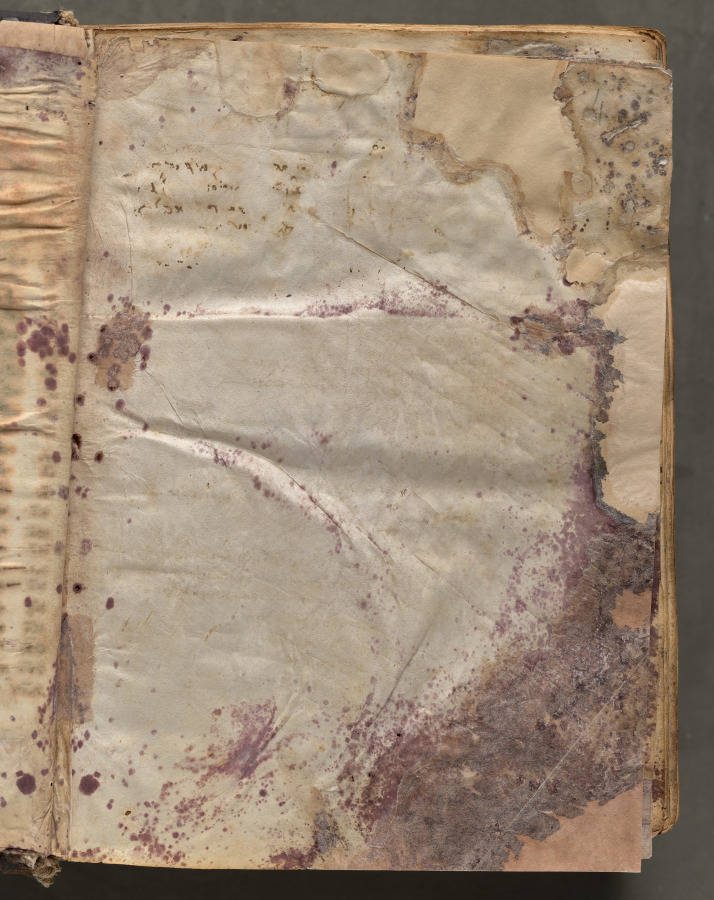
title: Text, folio 4 (recto), from a Gospel Book with Commentaries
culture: Byzantium, Constantinople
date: c. 1000–1100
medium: ink, tempera, and gold on vellum; leather binding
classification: Bound Volume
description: Each of the four gospels in this book opens on a page with brilliantly illuminated borders depicting the author of the text as well as birds-principally peacocks, symbols of the immortality of the soul-and fountains, representing the fountain of life and the salvation of the soul. This volume consists of 428 leaves with texts in Greek. Its level of sophistication suggests that it was probably written and decorated in a monastery in Constantinople.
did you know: Gospel Books were carried in procession through Byzantine churches.